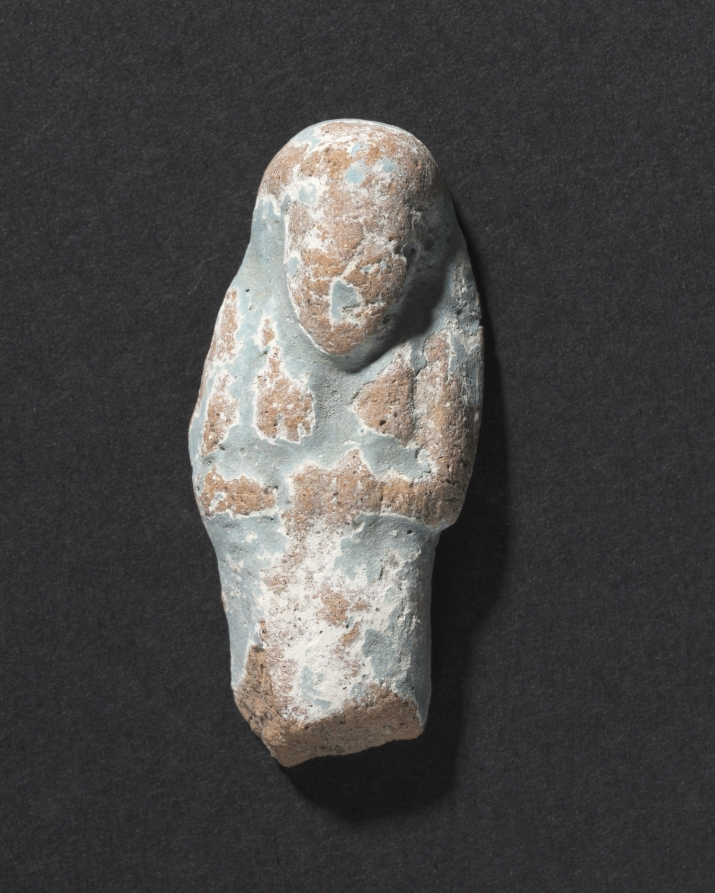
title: Shawabty of Ditamenpaankh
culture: Egypt, Late period (715–332 BCE), Dynasty 25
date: 715–656 BCE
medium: terracotta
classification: Funerary Equipment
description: High demand for shawabtys in the Late Period, a time when as many as 400 or more shawabtys were placed in the tomb with the deceased, gave rise to a specialized container for storing them: the shawabty box. This example is inscribed for the lady of the house, Ditamenpaankh, and was probably one of a pair originally made for her. The single-masted boat on the box's lid is perhaps an allusion to the pilgrimage of the deceased to the holy city of Abydos, the cult city of Osiris, king of the dead. The shawabtys inside are crude, mass-produced examples cast in an open mold. Made of terracotta, their blue paint imitates more costly shawabtys made of faience. As for the shawabty spell, it has been removed from its traditional location on the shawabty's front and relocated onto the sides of box, where it needed only to be written once, thus expediting production.